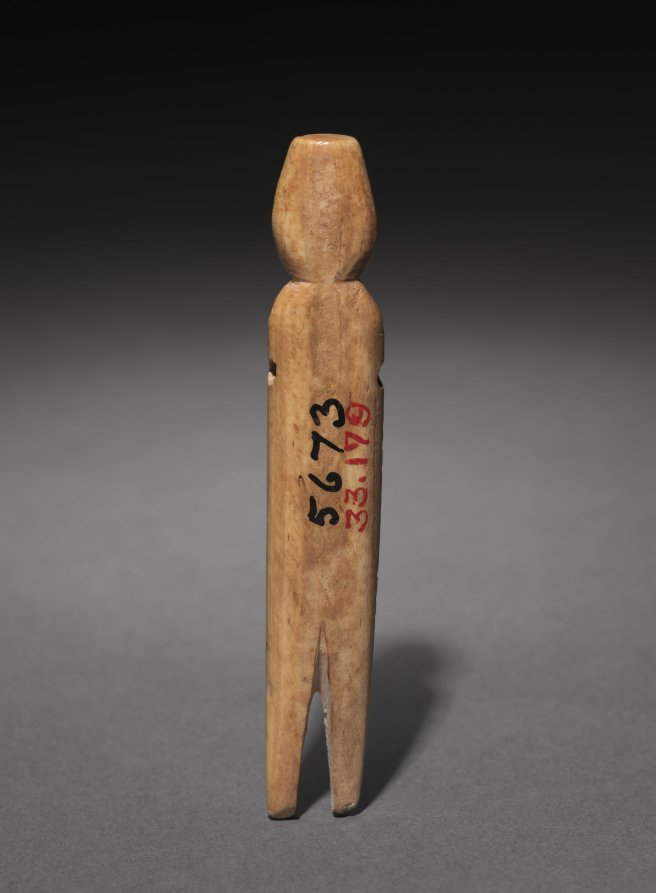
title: Amulet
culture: Parthian Empire (247 BCE–224 CE)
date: 1–200 CE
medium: carved bone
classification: Miscellaneous